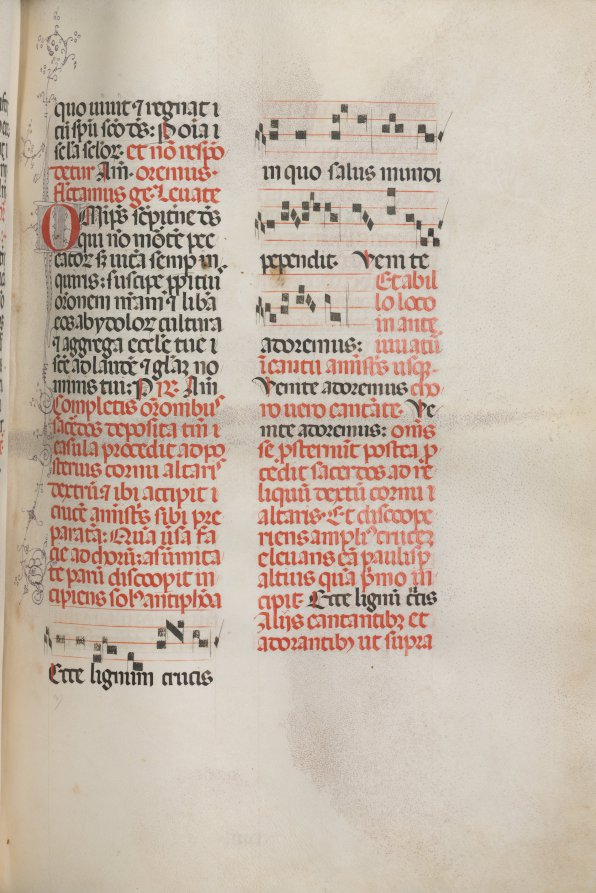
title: Missale: Fol. 148: Music for "Ecce lignum cruces..."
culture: Italy, Perugia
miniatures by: Bartolommeo Caporali (Italian, c. 1420–1503)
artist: assisted by Giapeco Caporali (Italian, d. 1478)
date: 1469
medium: ink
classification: Bound Volume